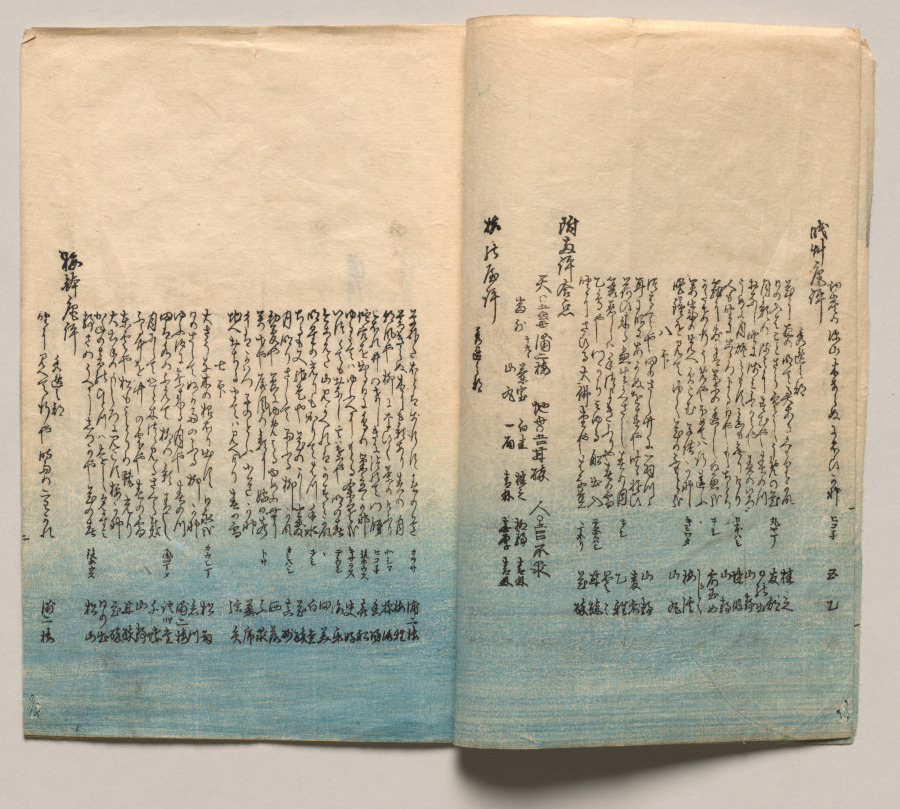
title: Spread Two from Verses for Winter and Spring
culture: Japan, Edo period (1615–1868)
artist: Utagawa Hiroshige (Japanese, 1797–1858)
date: 1850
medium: Woodblock printed book; ink and color on paper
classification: Bound Volume